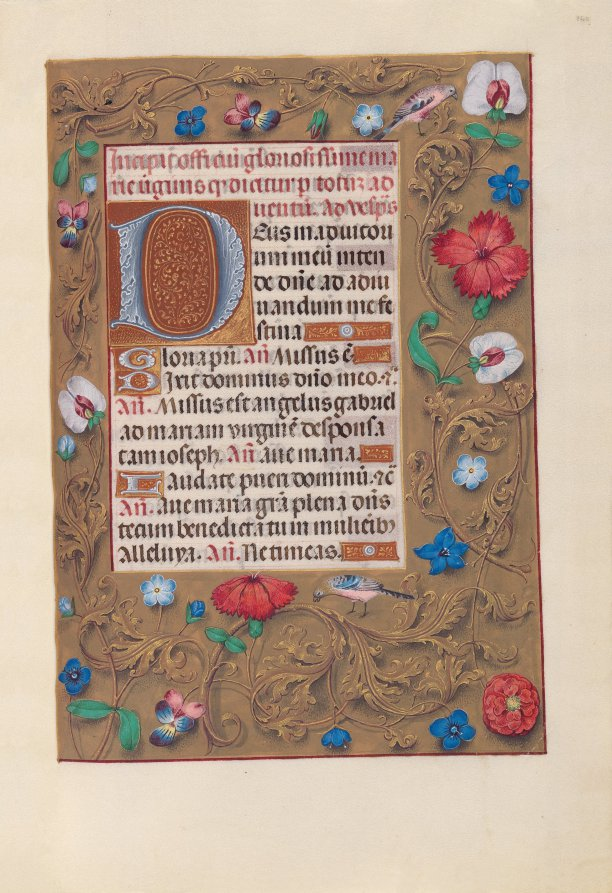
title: Hours of Queen Isabella the Catholic, Queen of Spain: Fol. 160r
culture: Flanders, Ghent and Bruges, late 15th century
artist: Master of the First Prayerbook of Maximillian (Flemish, c. 1444–1519)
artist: and Associates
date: c. 1500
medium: ink, tempera, and gold on vellum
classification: Bound Volume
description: This manuscript was illuminated by a circle of at least five highly organized manuscript painters active in the Flemish cities of Ghent and Bruges. The principal illuminator was Alexander Bening, who painted the majority of the book's miniatures. Manuscripts produced by this circle of artists are renowned for the decoration of their borders, which typically feature a rich variety of realistically-painted flowers, birds, and butterflies. This prayer book, called a book of hours, was intended not for a cleric, but for the private devotions of a lay person-in this case, Isabella the Catholic, Queen of Spain (1451-1504). Isabella's coat of arms embellishes the book's frontispiece. It is unlikely that the book was commissioned by the Queen herself; rather, she probably received it as a diplomatic gift from someone courting her patronage, perhaps Cardinal Francisco Jimenez de Cisneros. A Franciscan friar, Jimenez was dependent upon Isabella for his advancement, first to the post of Queen's confessor in 1492, and then to Archbishop of Toledo in 1495.